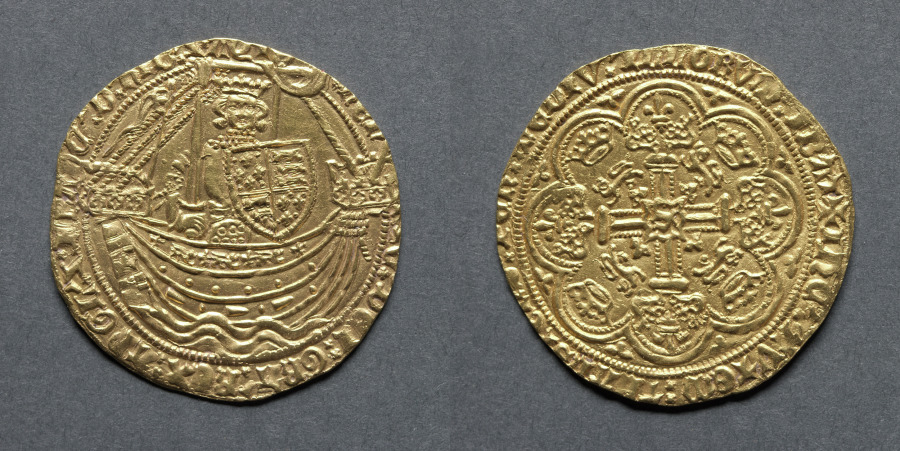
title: Noble: Henry IV Standing in Ship with Shield of Arms (obverse); Ornamental Cross with Lis Terminals (reverse)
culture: England, Henry IV, 1399-1413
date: 1399–1412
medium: gold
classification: Coins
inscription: HENRIC DI GRA REX ANGL S FRANC DNS HIB Z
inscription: IhC AVTEM TRANSIENS PER MEDIV ILLORVM IBAT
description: This is an exceedingly rare coin, only five pieces are known. Of them three are in the British Museum, one with the American Numismatic Society, and one in the Norweb collection, this specimen. Classified as part of the "heavy coinage series," refers both to its great rarity and to the economic state of England at this period. With the ascension of Henry IV, the first king of the House of Lancaster, an economic crisis caused the export of English coins and the import of base foreign currencies. With the English coinage undervalued with relation to foreign coinages the drain on bullion was so great that the supply failed. The result was that until the end of 1403 few coins were struck. At Easter, 1412, steps were taken to reduce the metal content/value of both gold and silver coins. This was done by reducing the weight of metal but issuing the coins at the same face value. Thus the Nobles of the light coinage series which follow that above weighed only 6.9983 gms. This corrected the situation somewhat. Gold coins remained scare, but by the end of the reign silver was plentiful. In modern times, when most current coins of the world have no intrinsic value above a few cents, the same maneuver is carried out by altering the exchange rate between the various currencies concerned.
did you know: The heavier weight gold Noble was the earlier issue of the reign of Henry IV and weighed more than those produced after 1413.